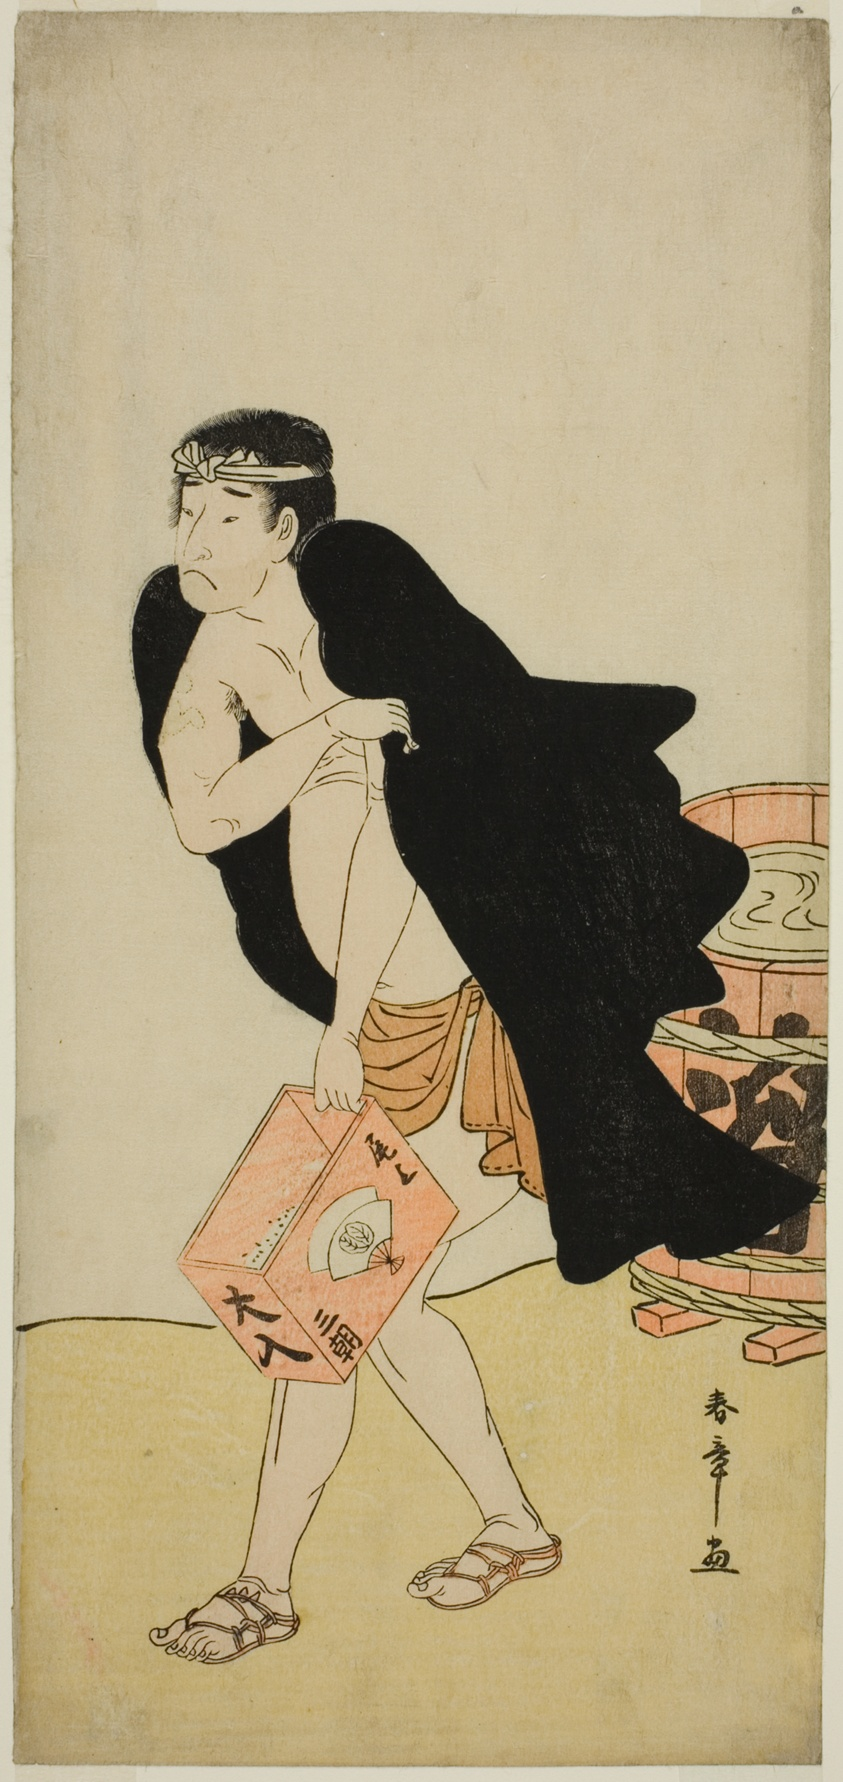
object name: Print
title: The Actor Onoe Matsusuke I as the Palanquin Bearer Gohei in the Play Kitekaeru Nishiki no Wakayaka, Performed at the Nakamura Theater in the Eleventh Month, 1780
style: Japanese (culture or style)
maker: Katsukawa Shunsho 勝川 春章; Japanese, 1726-1792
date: c. 1780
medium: Color woodblock print; hosoban; from a multisheet composition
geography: Japan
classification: woodblock print; print; asian art